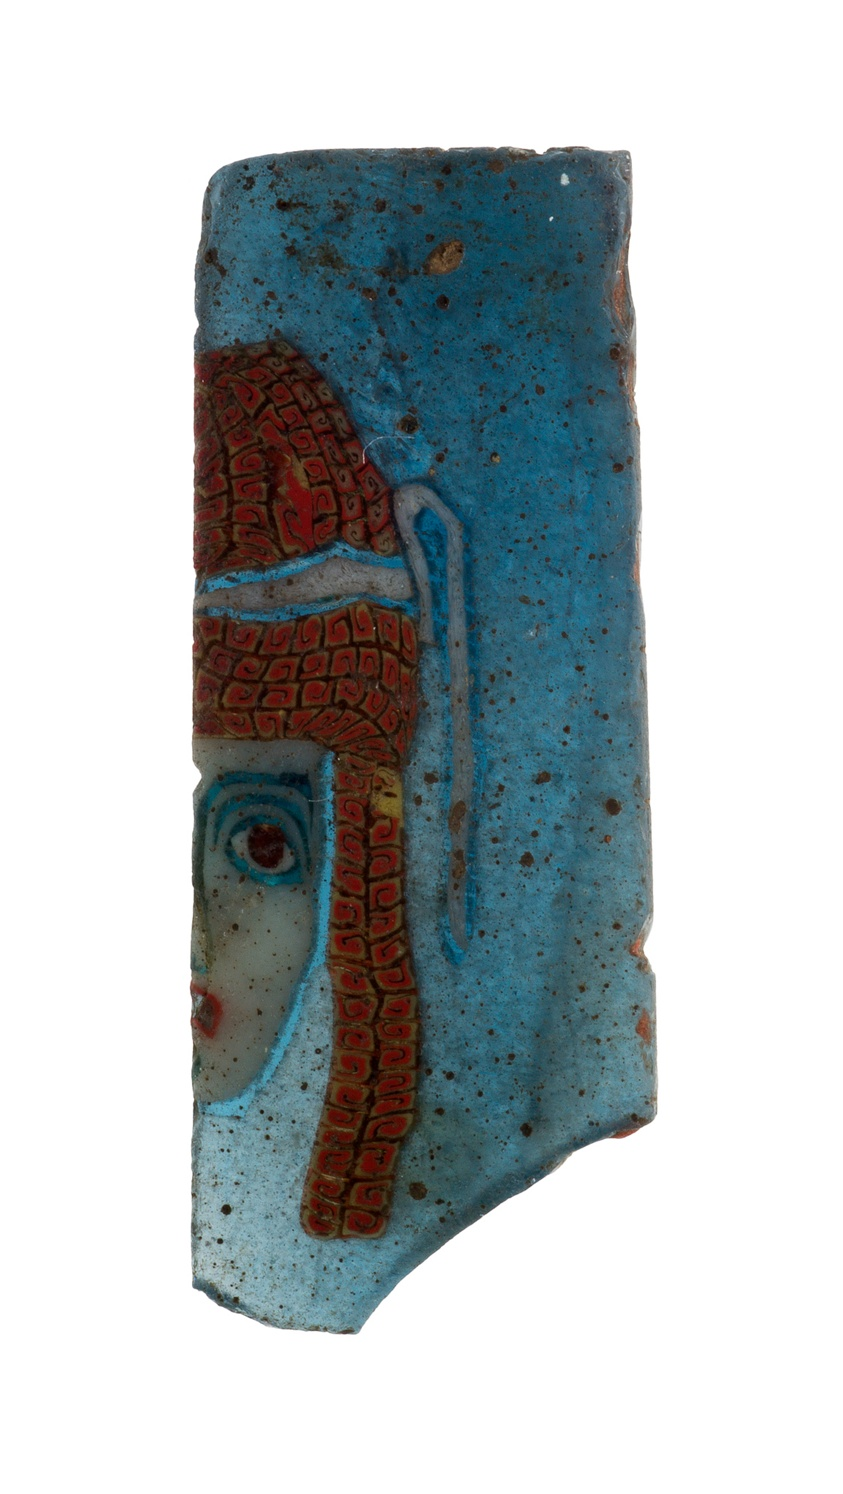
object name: Decorative Arts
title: Fragment of an Inlay Depicting a Theater Mask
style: ptolemaic, greco-roman (egyptian)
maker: Egyptian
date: late 1st century BCE-early 1st century CE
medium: Glass, mosaic glass technique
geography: Egypt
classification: glass; inlay; ancient art; decorative arts